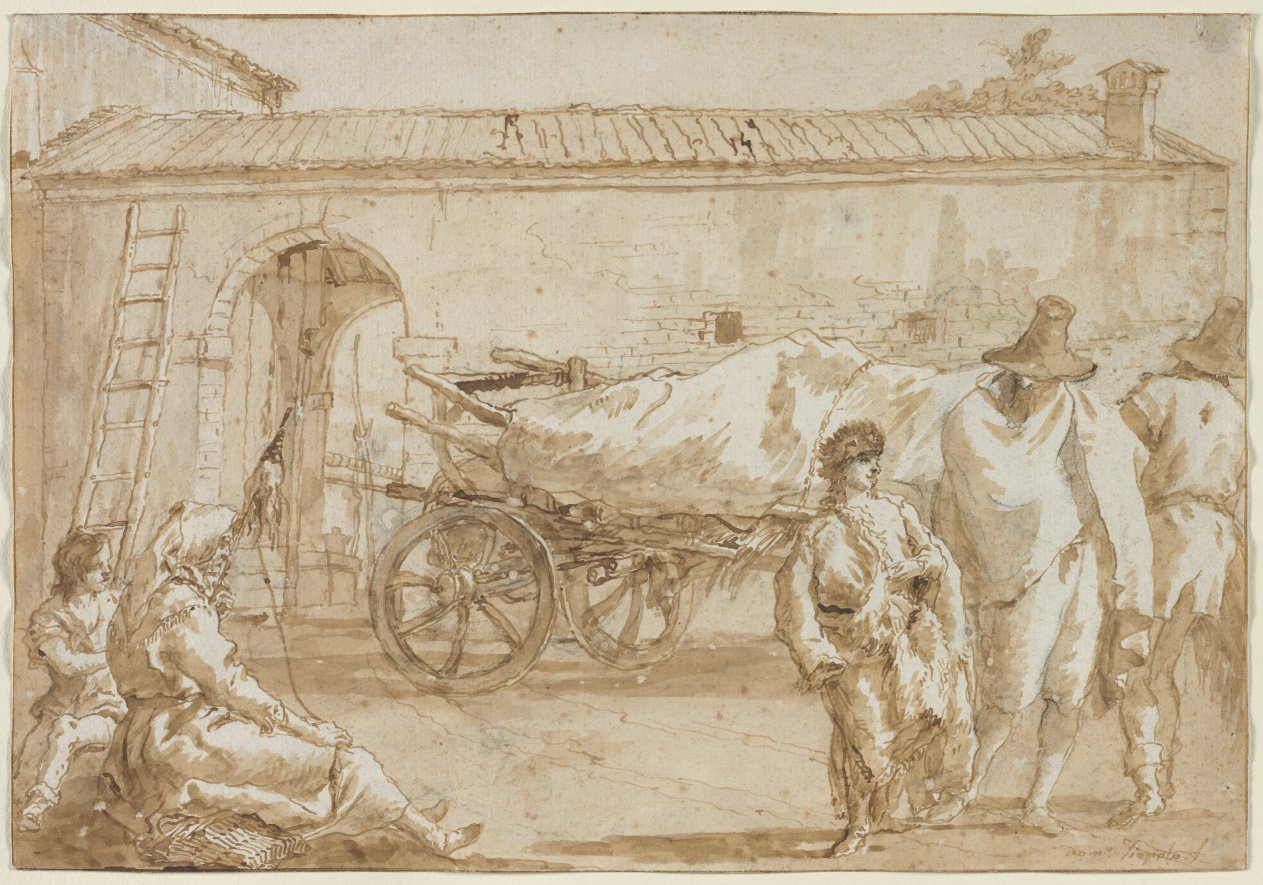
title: Peasants with a Farm-cart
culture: Italy, 18th century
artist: Giovanni Domenico Tiepolo (Italian, 1727–1804)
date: c. 1790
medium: pen and brown ink and brush and brown wash over black chalk; framing lines in brown ink over black chalk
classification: Drawing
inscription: signed, bottom right, in brown ink: Dom°. Tiepolo f ; VERSO, upper left, in black chalk: [S?] ; center, in graphite: 18 . [underlined] ; center, in black chalk: 18 [upside down] ; lower left, in brown ink: 4